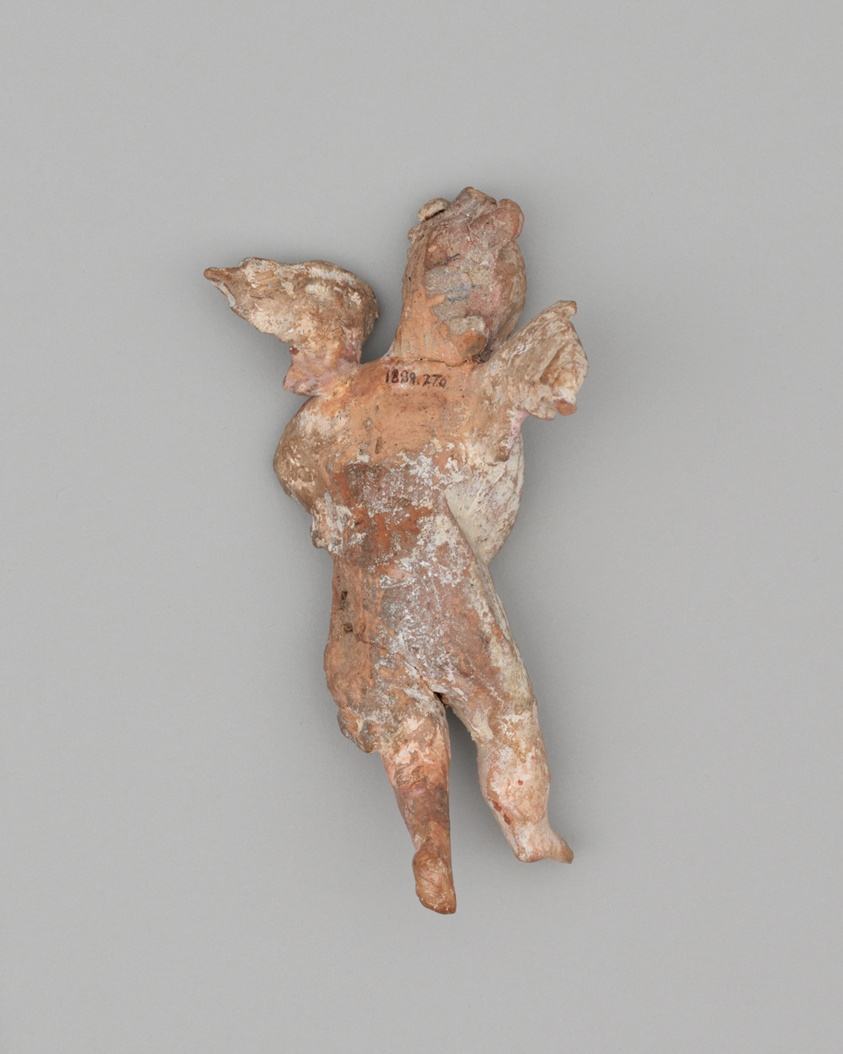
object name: Sculpture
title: Statuette of Eros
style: greek, ancient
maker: Greek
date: 3rd-2nd century BCE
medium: terracotta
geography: Greece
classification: earthenware; ceramics; sculpture; ancient art